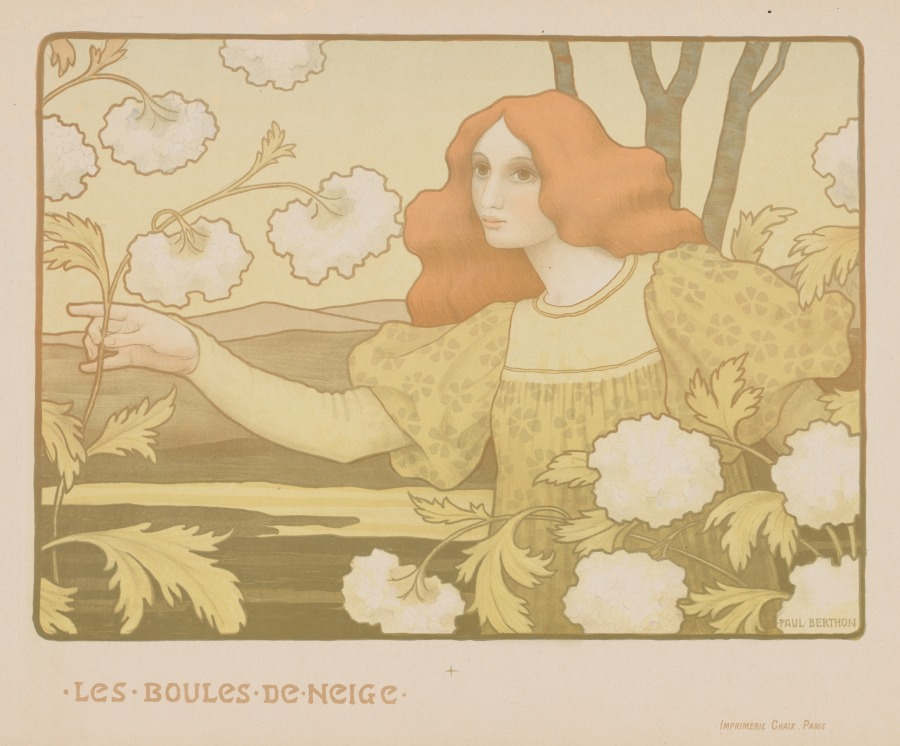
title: Snowballs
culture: France, 20th century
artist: Paul Berthon (French, 1872–1909)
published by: Philippe Chaix (French, 1850-)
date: c. 1900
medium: lithograph printed in colors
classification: Print